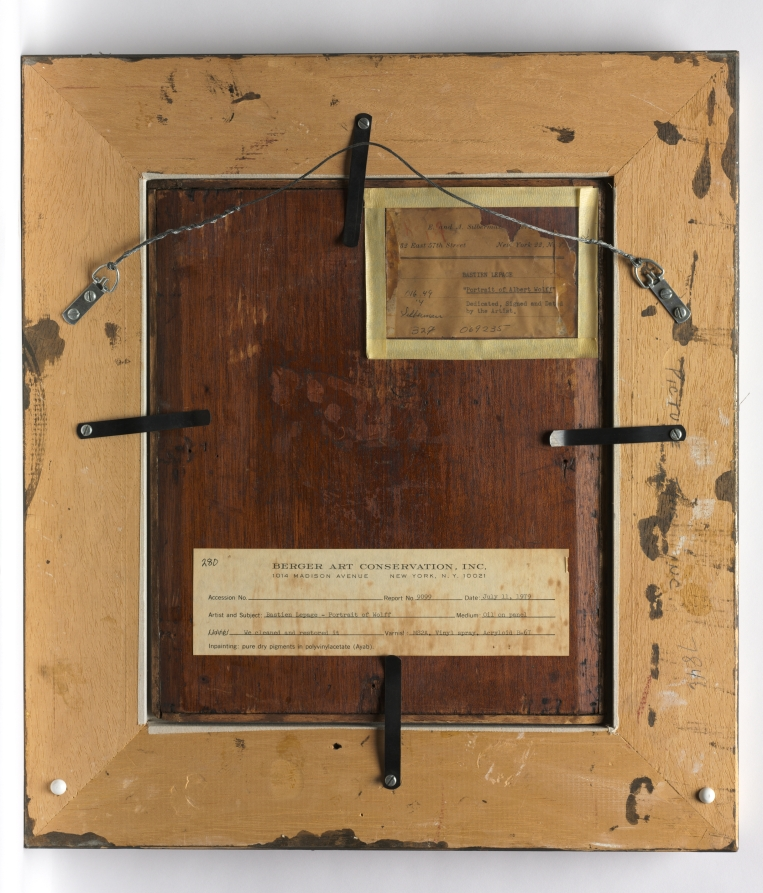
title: Albert Wolff in His Study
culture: France, 19th century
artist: Jules Bastien-Lepage (French, 1848–1884)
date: 1881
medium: oil on panel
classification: Painting